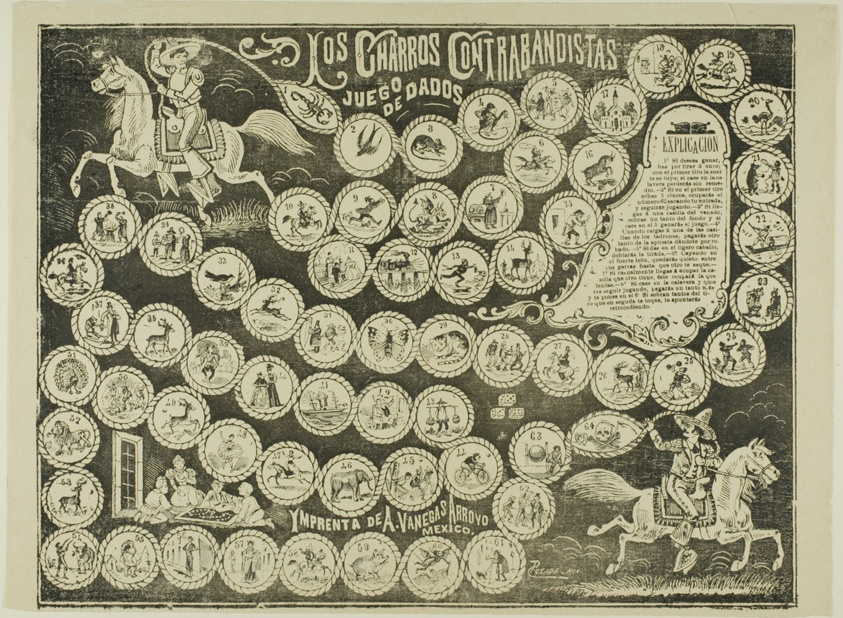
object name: Print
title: The Charlatan Smugglers Dice Game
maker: José Guadalupe Posada (Mexican, 1852-1913)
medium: Lithograph on paper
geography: Mexico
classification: lithograph; print; prints and drawing